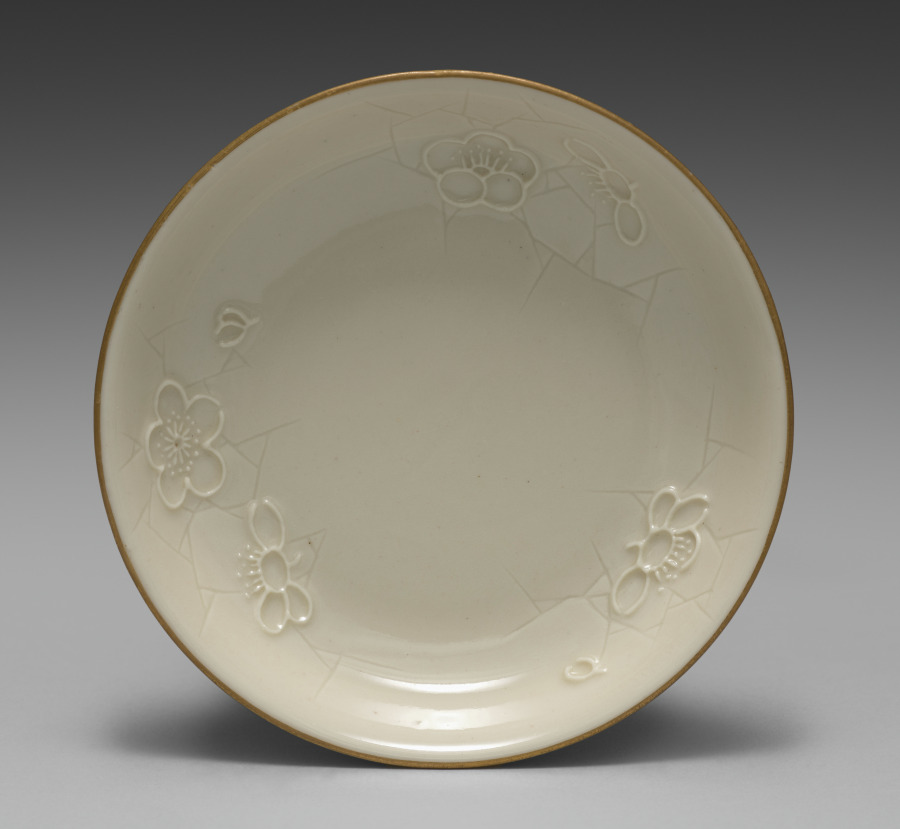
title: Small Dish from Dining Set with Plum Blossoms and Cracked-Ice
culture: Japan, Meiji period (1868–1912)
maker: Seifū Yohei II (Japanese, 1844–1878)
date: c. 1875–78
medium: Porcelain with molded designs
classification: Ceramic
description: Each item in this set has a delicate low-relief design of flowering plum branches over scattered, intersecting lines meant to resemble the cracked-ice surface of a frozen body of water and is signed on the base in gold pigment. While Yohei II produced many fine works in underglaze blue, like those produced by Kiyomizu Shichibei, he also made works in quite different styles later in his career, from the early 1870 s. In 1873, he was appointed purveyor to the Industrial Center of Kyoto Prefecture, a designation associated with Kyoto’s efforts to reach an international market through the port of Kobe; and from 1875 until his death, he was involved in national-level projects to present Japanese ceramics across the world. It was during this period that Yohei III was apprenticed to Yohei II, and it has been suggested that this set may in fact be an early example of Yohei III’s work, which he signed with his teacher’s name. Decorated with flowers resembling Japanese textile motifs, the set calls to mind the design of Yohei II’s pair of vases with plum blossoms in the Victoria and Albert Museum. Here, the elaborate trees created for a formal public exhibition setting have been translated into the approachable blossoms of the genteel domestic environment. While the designs are consistent across the pieces, each raised flower petal and pistil and each incised line in the ice was done by hand, so the cups, bowls, and dishes are similar yet unique. The bottoms of two boxes once identified the set’s owner, but the information has been deliberately obscured with black ink. However, inscriptions still visible appear to indicate two occasions, once at the end of July 1886 , and once again in June 1916 , when parts of the set were requested from Hokura in Niigata Prefecture. The location corresponds to a neighborhood in the present-day city of Jōetsu. The surname Tsuji 辻 also appears on a paper tag affixed to one of the box cloths. Future research may possibly reveal more about their provenance. A vase by Yohei III in a private collection combines the formal grandeur of the Yohei II vases in the Victoria and Albert Museum with the gentler design of this dining set, placing flowering plum trees against soft, scalloped-edge clouds resembling those in golden screens.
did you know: The dining wares have a creamy white coloration that the four boxes containing them identify as Korean in style.